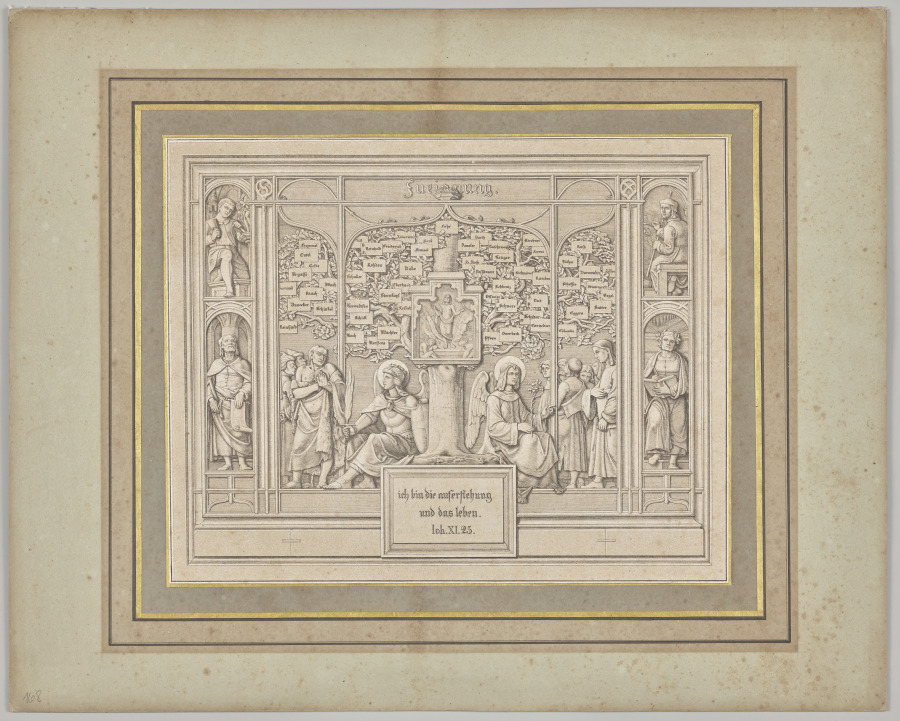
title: Dedication. John XI, 25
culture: Germany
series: Seven Areas from Salzburg and Berchtesgaden. Arranged according to the seven days of the week, connected by two allegorical sheets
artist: Ferdinand Olivier (German, 1785–1841)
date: 1818–23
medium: lithograph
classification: Print